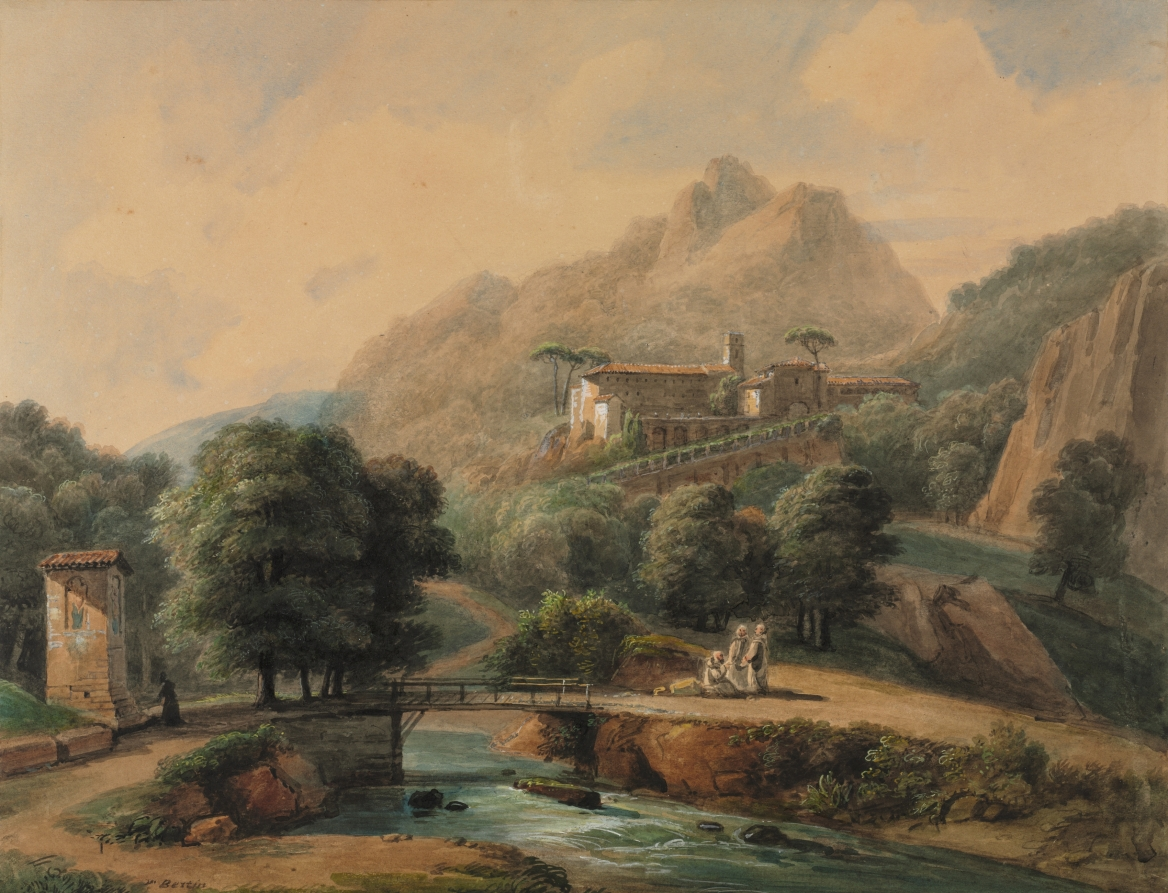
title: Paysage Italien: L'Abbaye et Les Religieux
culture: France, 19th century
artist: Jean-Victor Bertin (French, 1767–1842)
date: late 1800s-1900s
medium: watercolor with graphite and heightened with gouache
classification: Drawing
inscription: Signed lower left in black ink: V. Bertin